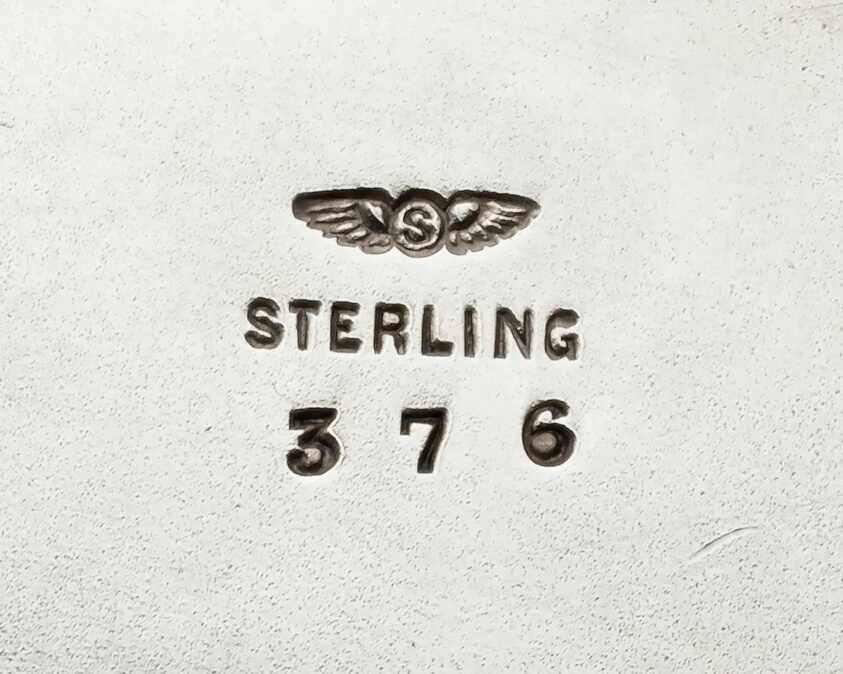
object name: Metalwork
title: Berry Bowl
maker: Design attributed to George W. Shiebler (American, 1846–1920); Produced by George W. Shiebler (1876–91); or produced by George W. Shiebler and Company (1892–1910); New York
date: 1885–95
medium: Silver, parcel-gilt silver, and copper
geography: New York City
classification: bowl; vessel; decorative arts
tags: cherries, berries, insects, spiders, leaves, dining, drinking